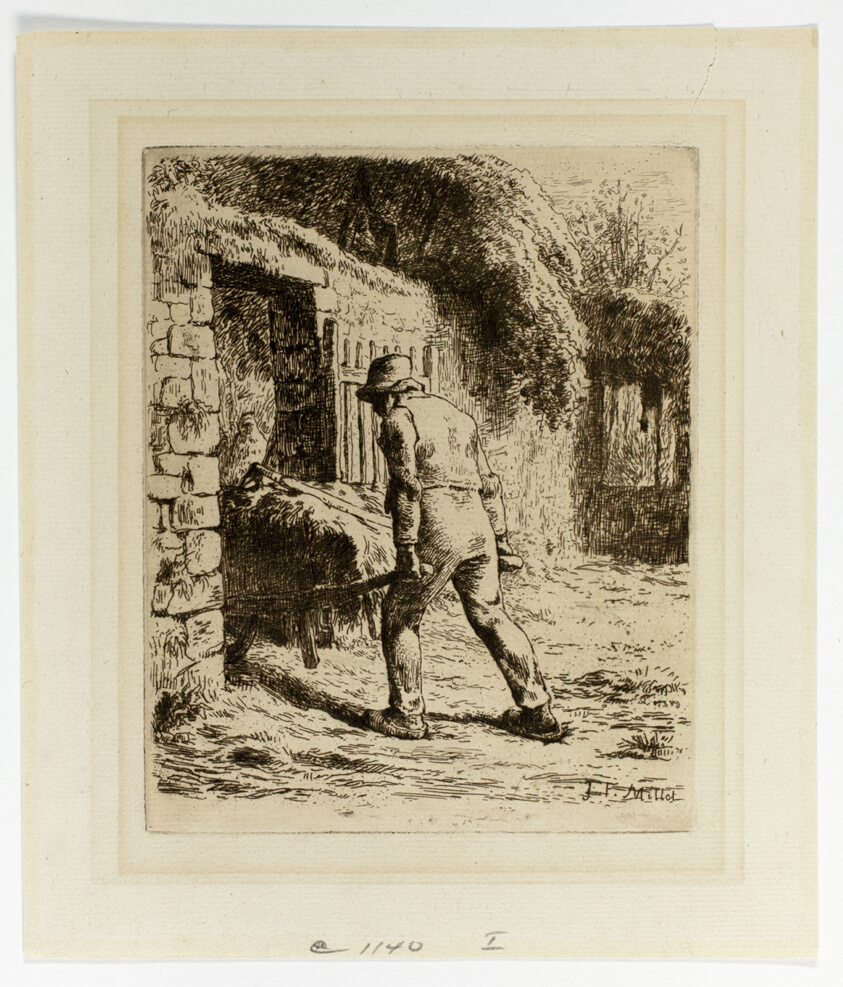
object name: Print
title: Peasant with a Wheelbarrow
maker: Jean François Millet (French, 1814-1875); printed by Auguste Delâtre (French, 1822-1907)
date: 1855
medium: Etching and drypoint on ivory wove paper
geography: France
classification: etching; print; prints and drawing